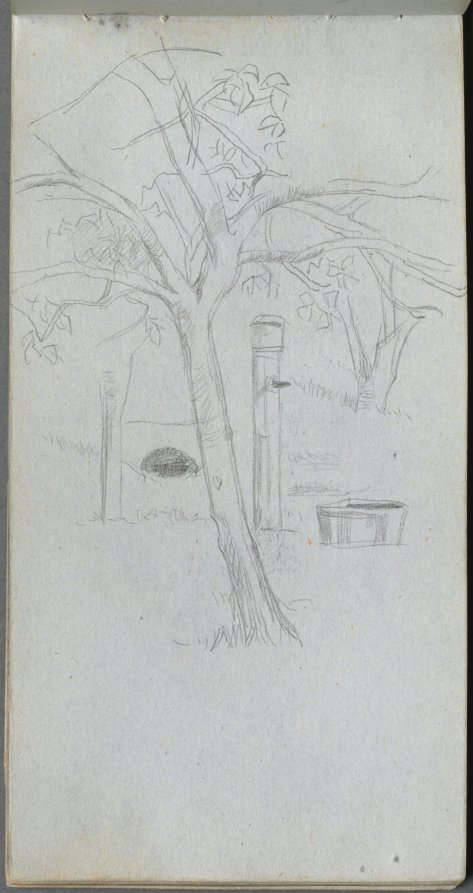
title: Sketchbook, page 36: Tree Study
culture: France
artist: Ernest Meissonier (French, 1815–1891)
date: c. 1860s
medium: graphite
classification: Bound Volume